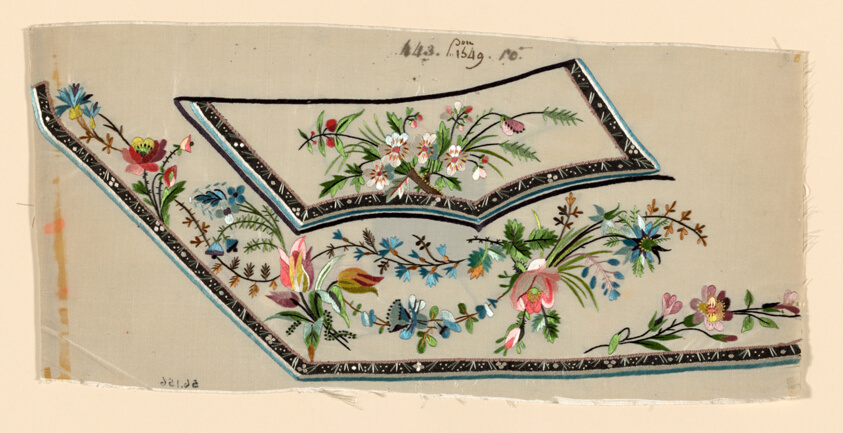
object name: Textile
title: Salesman's Sample (Waistcoat Pocket)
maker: France, probably Lyon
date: 1780/90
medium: Silk, plain weave; appliquéd with silk, plain weave; embroidered with silk floss and silk chenille yarns in outline, satin, single satin and stem stitches; couching and French knots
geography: France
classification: textile; needlework (visual works); costume